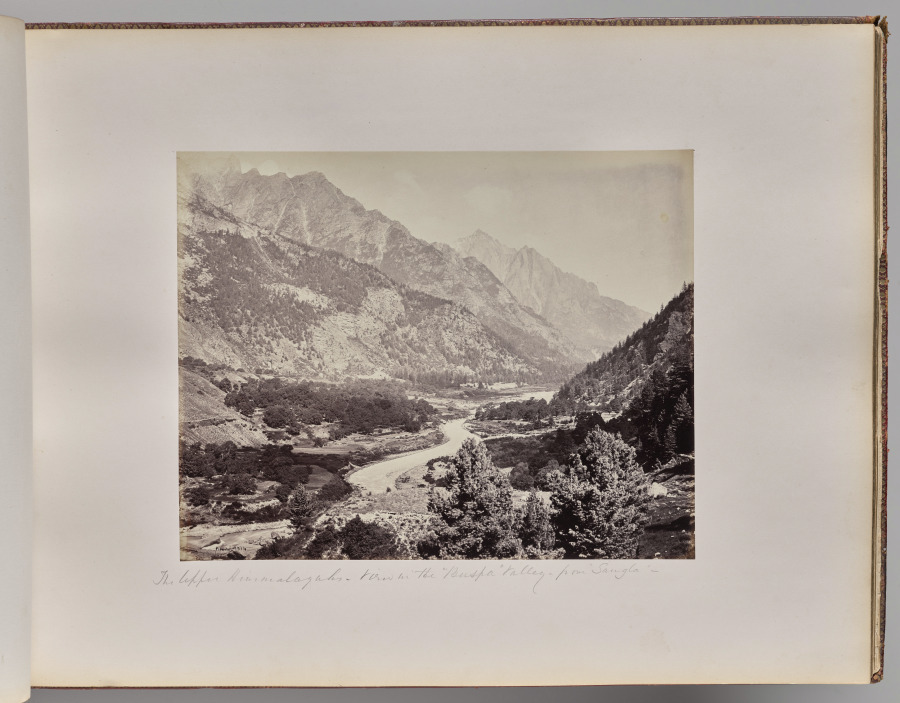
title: The Upper Himmalayahs. View in the Buspa Valley from Sangla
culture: England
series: Photographs of Northern India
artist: Samuel Bourne (British, 1834–1912)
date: 1863–70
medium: albumen print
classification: Photograph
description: The 50 images in this album, all taken in the 1860s, move from the hill towns of the Himalayas down to cities including Lahore (now in Pakistan), Delhi, Lucknow, Agra, Benares (now Varansi), and Calcutta (now Kolkata). Architectural studies of major monuments offer valuable historical records of what sites such as the Taj Mahal and the imperial mosque of the Mughal emperors in Delhi looked like before 20th-century restorations.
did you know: Samuel Bourne, the author of most the images in this album, was a banker in England before he moved to India to become a professional photographer.